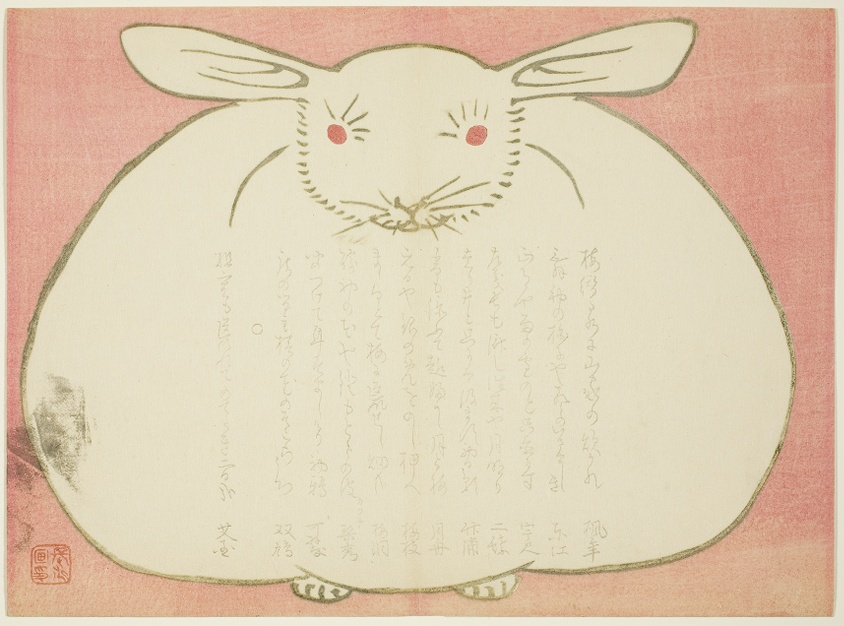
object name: Print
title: Portrait of a Rabbit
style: Japanese (culture or style)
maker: Yabu Chosui (Japanese, 1814-c. 1870)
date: 1867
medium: Color woodblock print; surimono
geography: Japan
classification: woodblock print; print; asian art